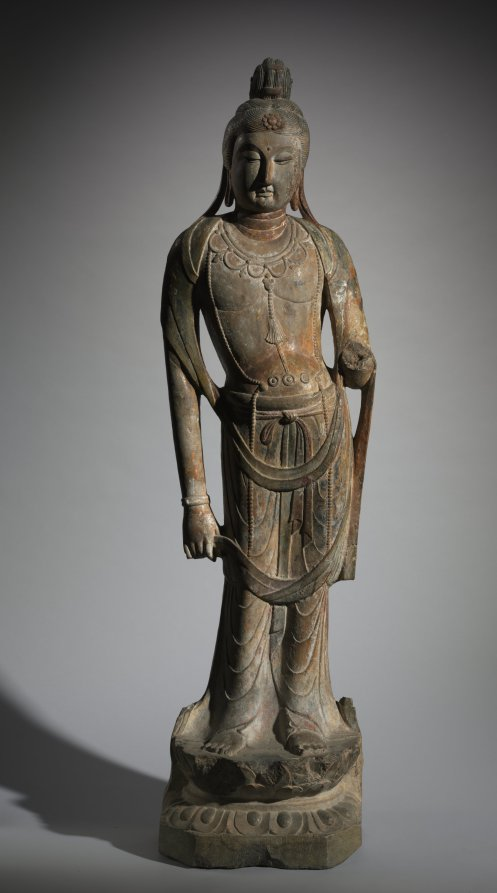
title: Standing Guanyin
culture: China, Tang dynasty (618-907)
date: 700s?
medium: limestone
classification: Sculpture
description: The statue is identified and dated by an inscription to 687. There is a marked restraint and stately elegance of the well-proportioned figure standing in a relaxed pose.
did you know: The statue retains a good deal of old polychrome.